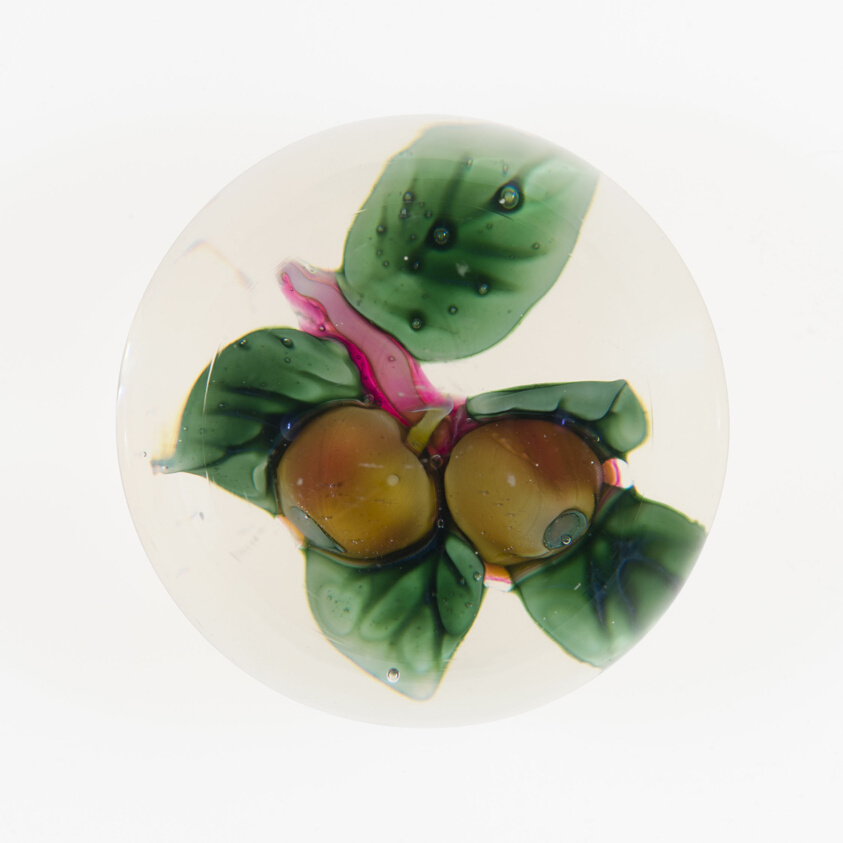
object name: Glass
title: Paperweight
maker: Saint-Louis Glassworks (Cristalleries de Saint-Louis); Lorraine, France, founded 1586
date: 19th century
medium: Glass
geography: Saint-Louis-lès-Bitche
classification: paperweight; lampwork; european decorative arts; glass